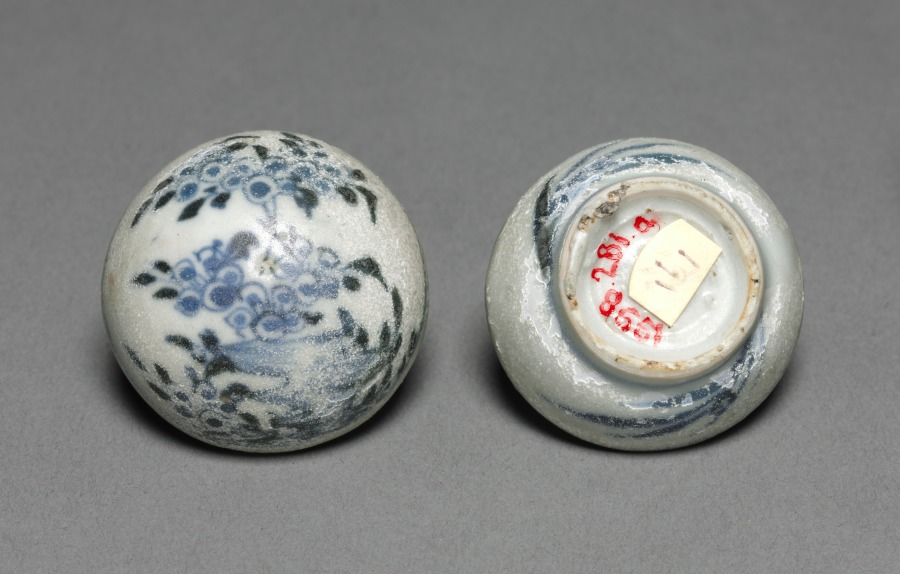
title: Pill Box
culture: China, Qing dynasty (1644-1911)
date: c. 1752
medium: porcelain with blue and white decoration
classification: Ceramic